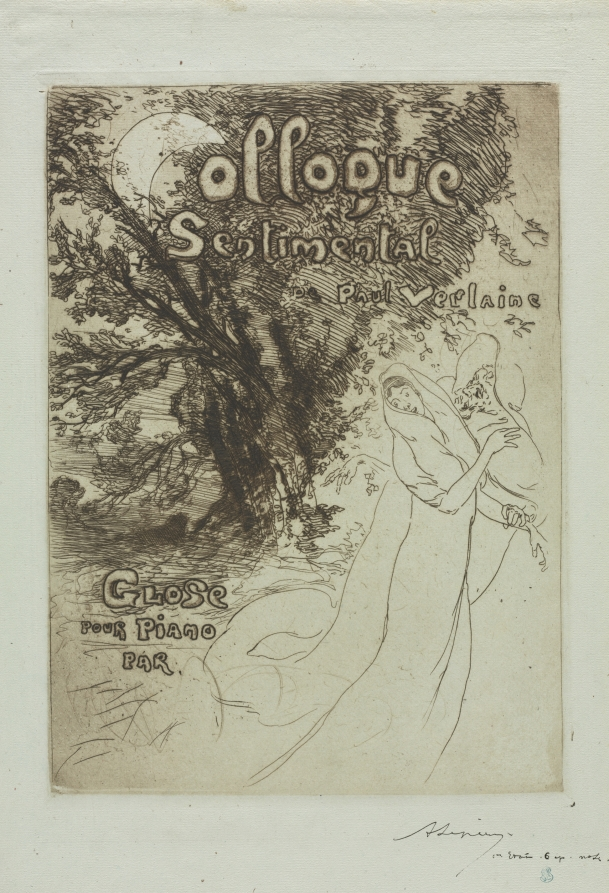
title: Sentimental Colloquy of Paul Verlaine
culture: France, 19th century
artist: Auguste Louis Lepère (French, 1849–1918)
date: 1897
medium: etching and aquatint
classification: Print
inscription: lower right margin, in pen and ink: "A Lepere ?Erais 6 ep."